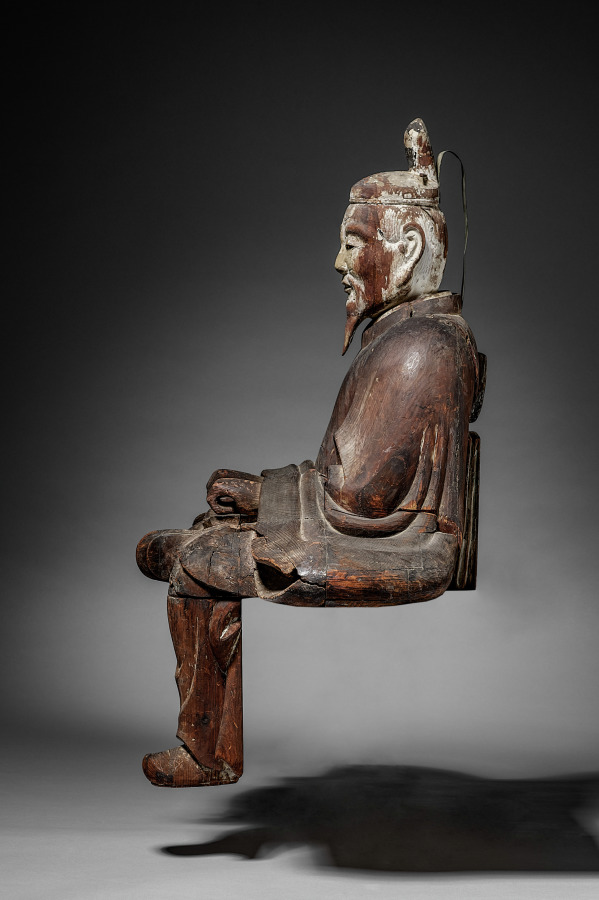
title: One of a Pair of Guardian Figures (Zuishin)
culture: Japan, Muromachi period (1392–1573) to Edo period (1615–1858)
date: c. 1560–1625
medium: Japanese cypress (hinoki) with traces of color; crystal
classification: Sculpture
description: Sculptors carved these two figures to look like members of the guard who protected the Japanese aristocracy in the 10th to 12th centuries. The pair belong in the roofed gate of a Shinto shrine. Their role was to embody the divine protectors of the deities, or kami, residing at the shrine. Their inset crystal eyes make them appear vigilant.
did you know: Some Japanese sculptors used to specialize in inset crystal eyes.